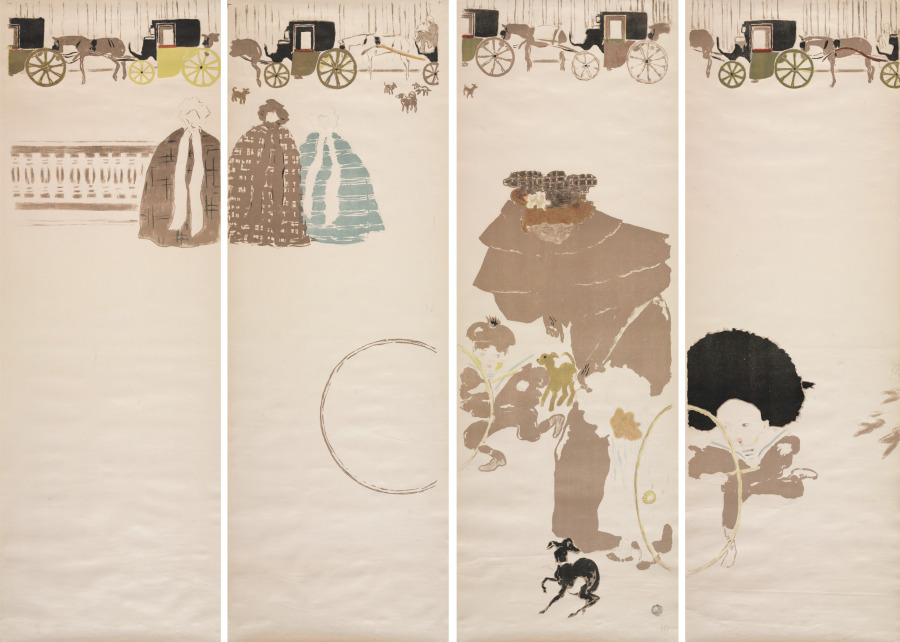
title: Nursemaids’ Promenade, Frieze of Carriages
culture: France, 19th century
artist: Pierre Bonnard (French, 1867–1947)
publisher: Molines, Galeries Lafayette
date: 1895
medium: color lithographs on wove paper, screen with four panels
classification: Print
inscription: signed on 2008.31.c, lower right, on stone: PB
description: This charming scene of a nanny and her three charges extends across four panels meant to be mounted as a folding screen. Pierre Bonnard emulated the solidly colored flat forms of Japanese color woodcut prints, which he collected. He featured the screen in his first solo exhibition at Paris's prestigious Galeries Durand-Ruel in 1896.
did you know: Although this screen was issued in an edition of 110, only about 20 copies survive today.